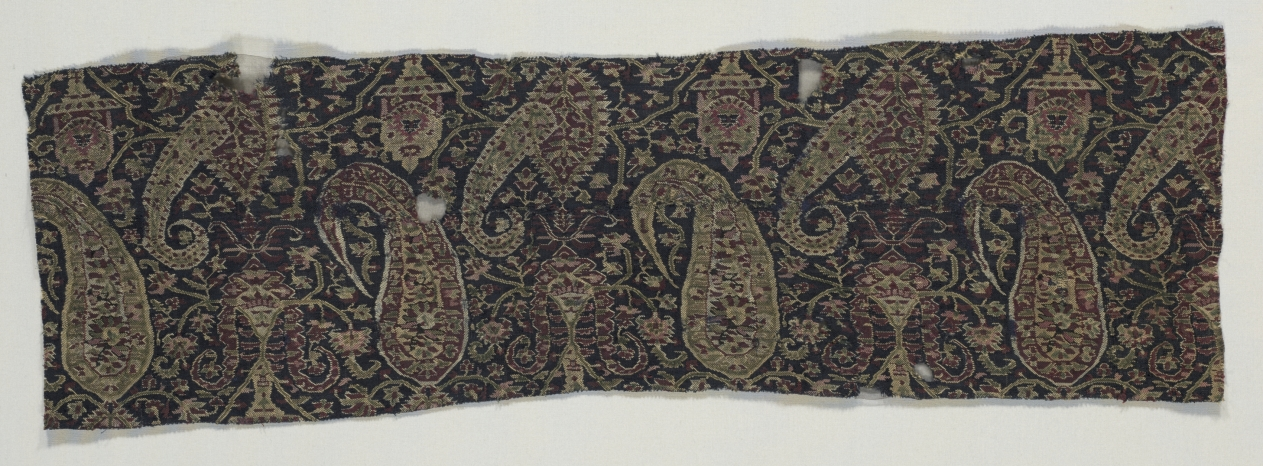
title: Fragment of a Shawl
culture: India, Punjab, 19th century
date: 1800s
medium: tapestry twill; wool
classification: Textile